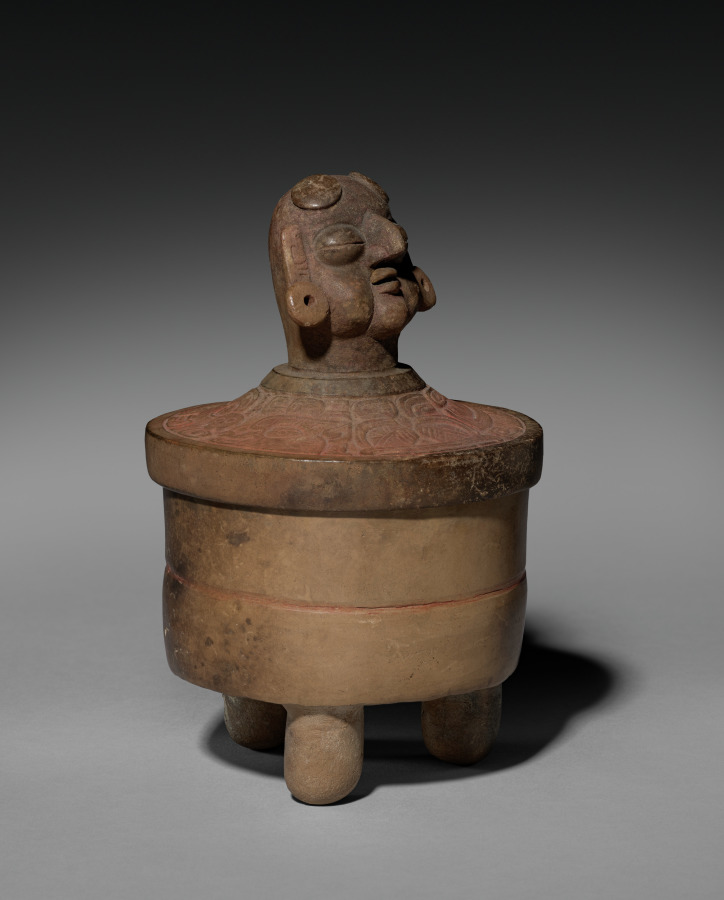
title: Tripod Vessel with Lid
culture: Mexico or Central America, Maya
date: 250–600 CE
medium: earthenware with pigment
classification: Ceramic